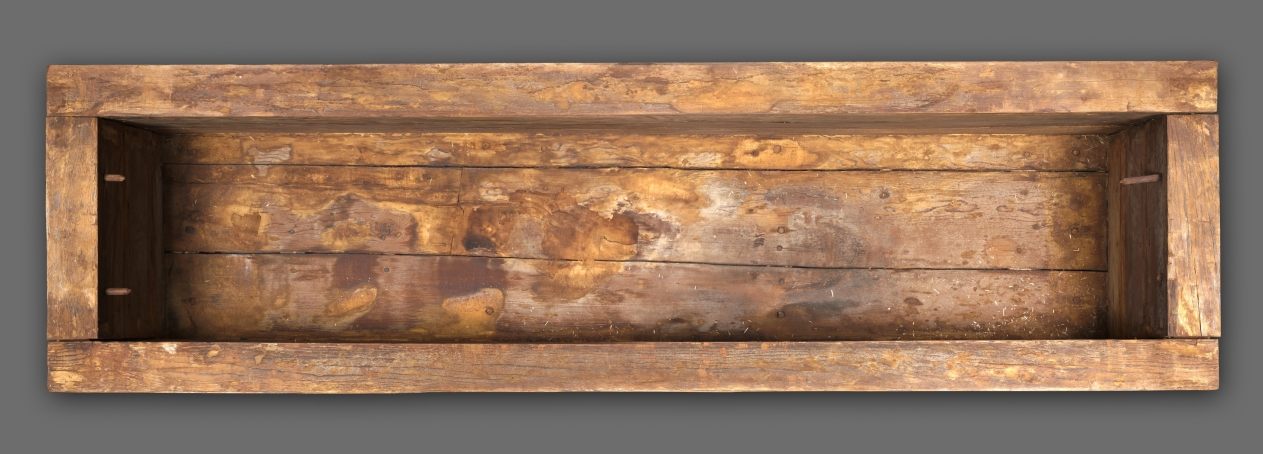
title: Coffin of Senbi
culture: Egypt, Meir, Middle Kingdom, mid-Dynasty 12, reign of Amenemhat II to Sesostris III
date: c. 1918–1859 BCE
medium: gessoed and painted cedar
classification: Funerary Equipment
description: The most common type of coffin during the Middle Kingdom took the shape of a rectangular box with lid. The mummy inside was placed on his left side, facing east, his head behind the two magical eyes. These—in the shape of human eyes, to which have been added the markings of a falcon's head—were supposed to enable him to behold the rising sun, reborn daily. The long horizontal inscriptions are prayers to Anubis (god of embalming) and Osiris (god of the dead) for offerings of food and drink and other items necessary for survival in the afterlife. The short vertical inscriptions place him under the protection of the gods of earth, sky, air, and moisture, as well as various funerary deities.